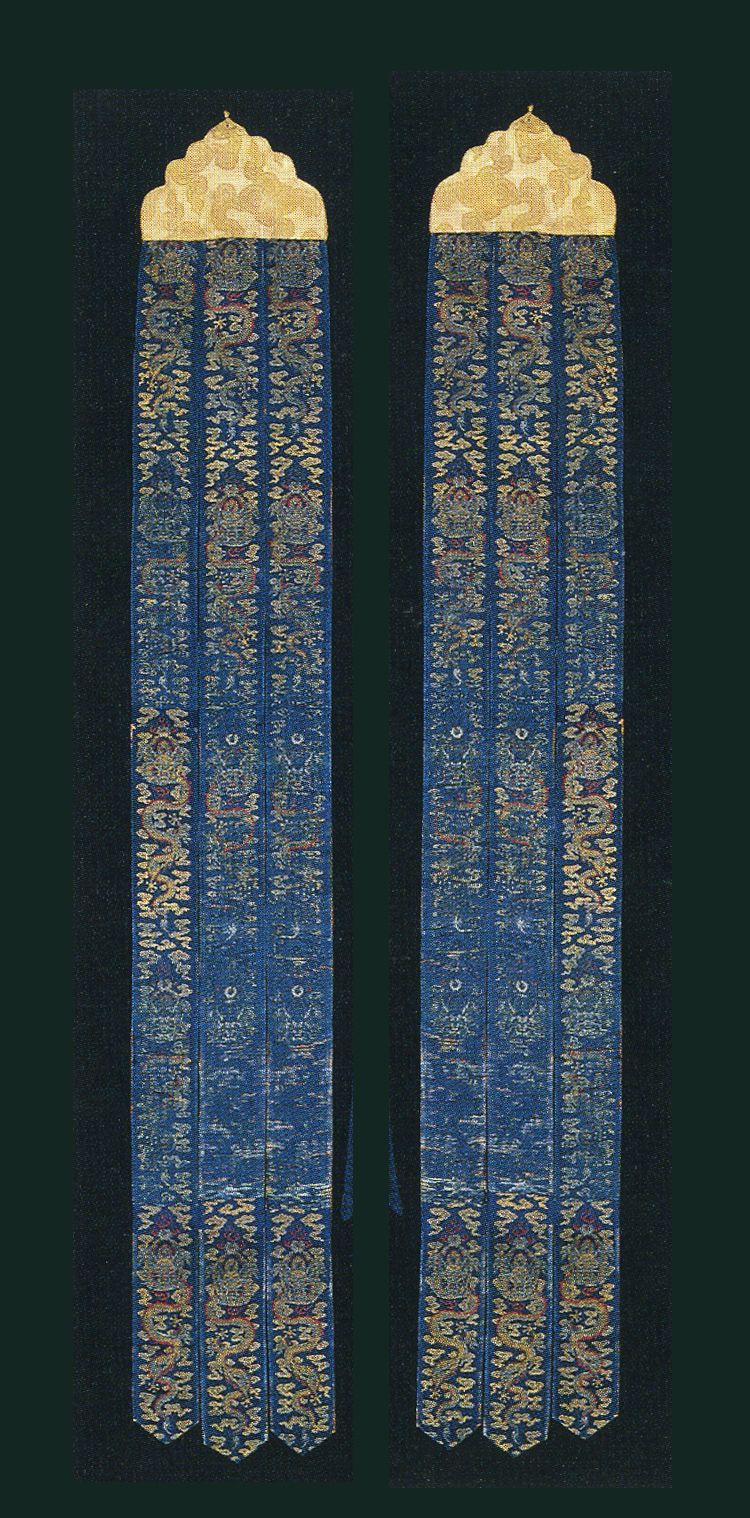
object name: Textile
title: Pair of Banners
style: qing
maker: China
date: Qing dynasty (1644–1911), 1650/1700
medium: Silk, 7:1 satin damask weave over boards; streamers: silk, warp-float faced 5:1 satin weave with plain interlacings of secondary binding warps, supplementary patterning wefts, and self-patterning ground wefts; lined with cotton, plain weave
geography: China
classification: textile; weaving